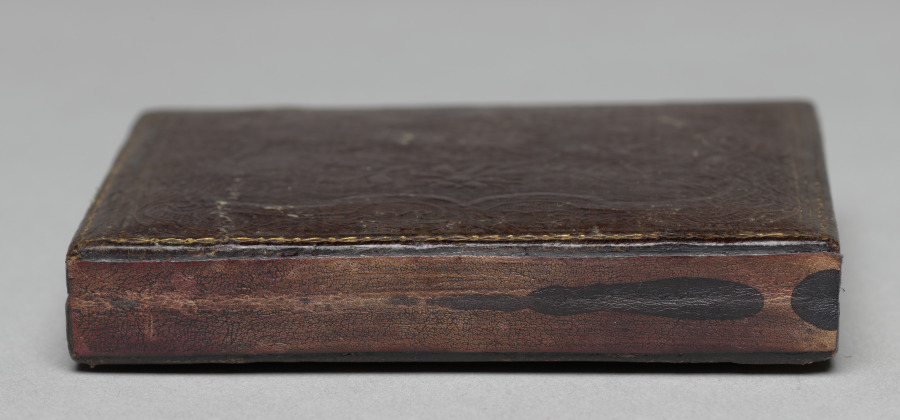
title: Magician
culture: America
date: c. 1850–55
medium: daguerreotype, sixth plate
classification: Photograph